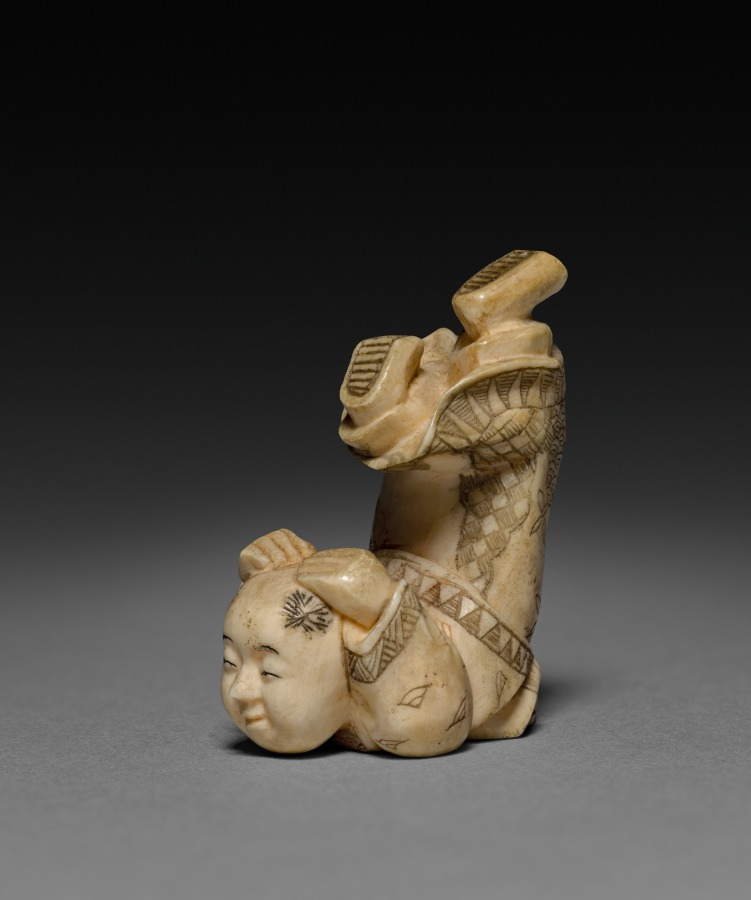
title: Netsuke of Child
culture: Japan, Meiji period (1868–1912)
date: early 1900s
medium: ivory, pigment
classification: Ivory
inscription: 玉心